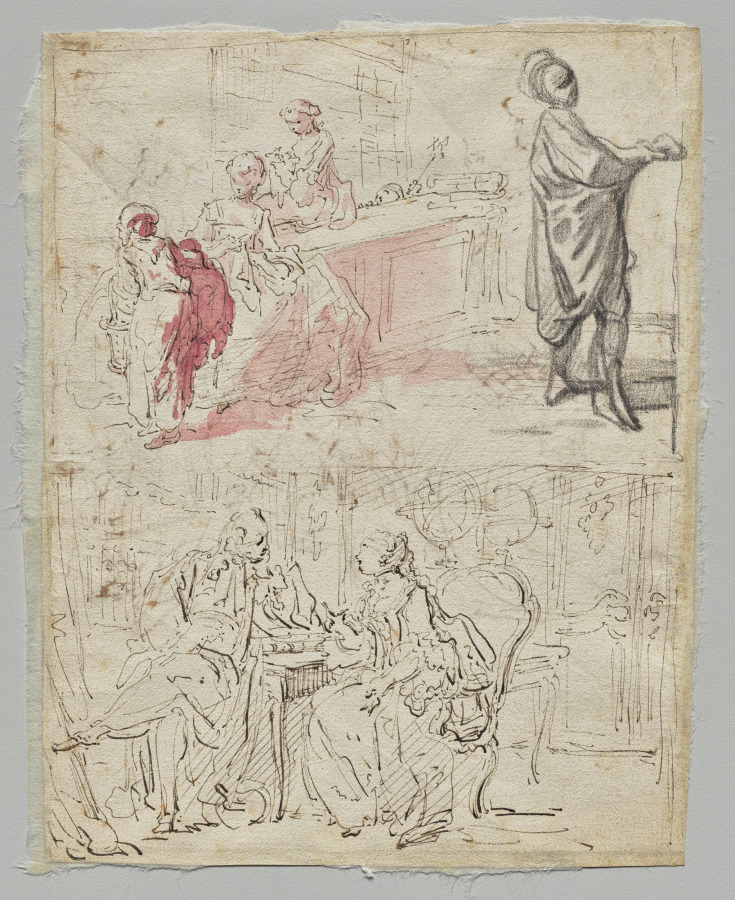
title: Theatre Scene (recto)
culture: France, 18th century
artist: Gabriel de Saint-Aubin (French, 1724–1780)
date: c. 1765–75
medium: Pen and brown ink, black crayon and pink wash on laid paper (recto)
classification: Drawing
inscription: Watermark: C(?) TORE(?)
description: Gabriel de Saint-Aubin was known for his distinctively sketchy style and interest in depicting performances such as dance and theater, the subjects seen here. The artist developed a distinctive composite style of sketching, and this work exemplifies his practice of covering both sides of a sheet of paper with diverse images in varying media.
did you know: Because of Gabriel de Saint-Aubin’s focus on social events and contemporary culture, his drawings are considered important records of eighteenth-century Parisian life.